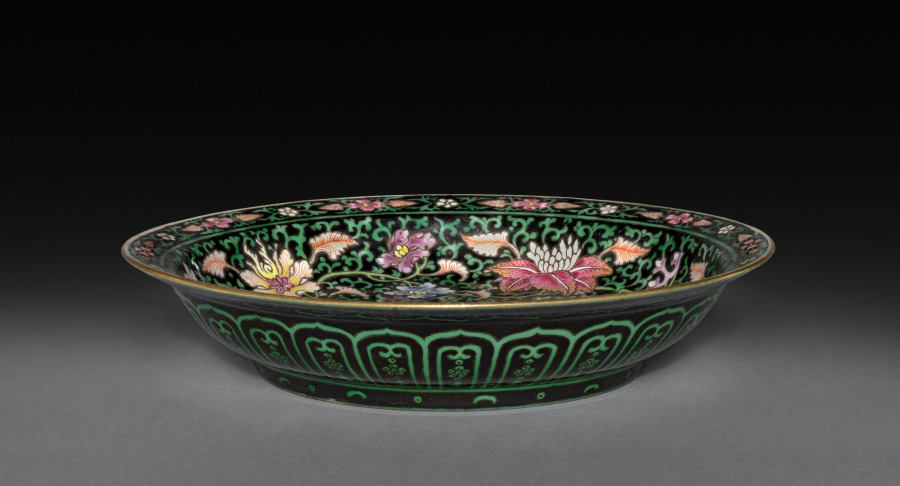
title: Dish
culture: China, Qing dynasty (1644–1911), Qianlong reign (1736–95)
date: 1736–95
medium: porcelain with famille rose overglaze enamel decoration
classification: Ceramic